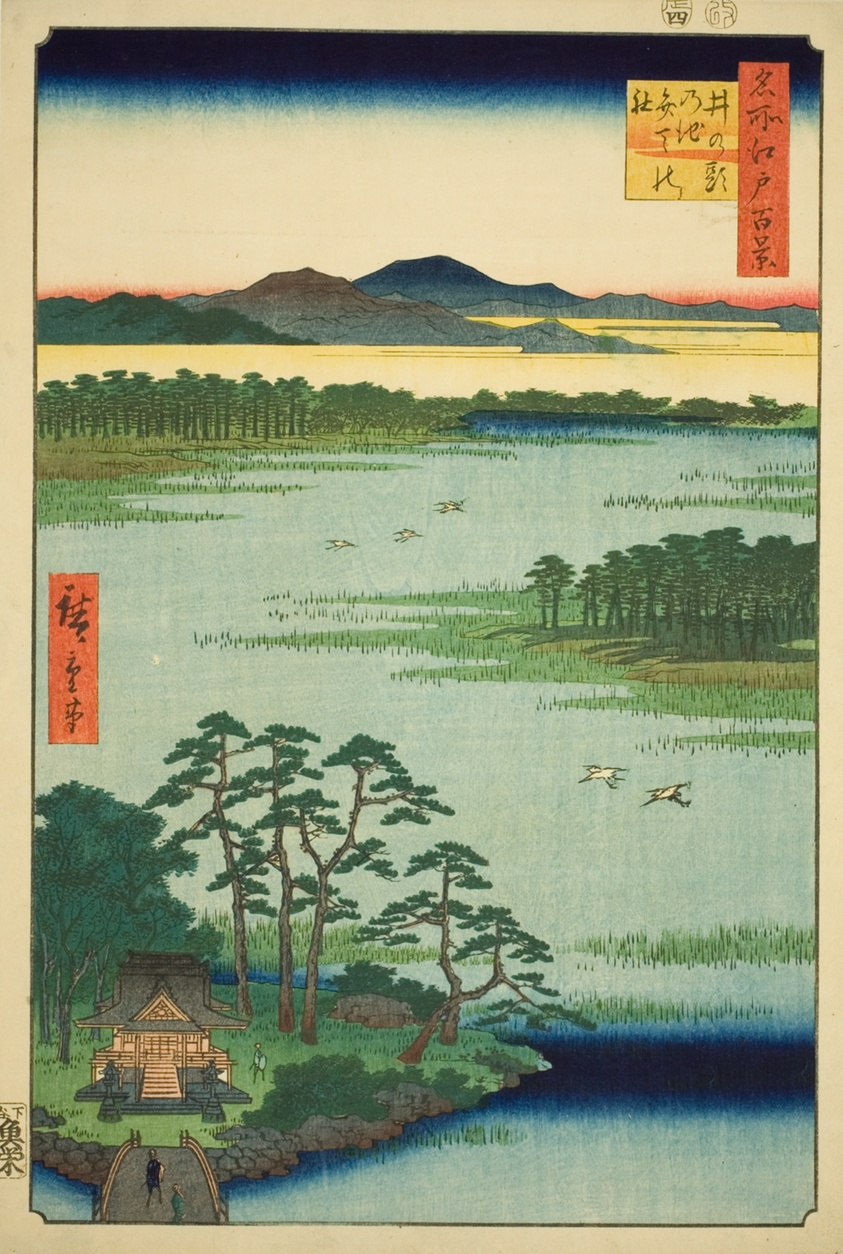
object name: Print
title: Benten Shrine and Inokashira Pond (Inokashira no ike Benten no yashiro), from the series "One Hundred Famous Views of Edo (Meisho Edo hyakkei)"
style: Japanese (culture or style)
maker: Utagawa Hiroshige 歌川 広重; Japanese, 1797-1858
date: 1856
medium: Color woodblock print; oban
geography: Japan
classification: print; asian art